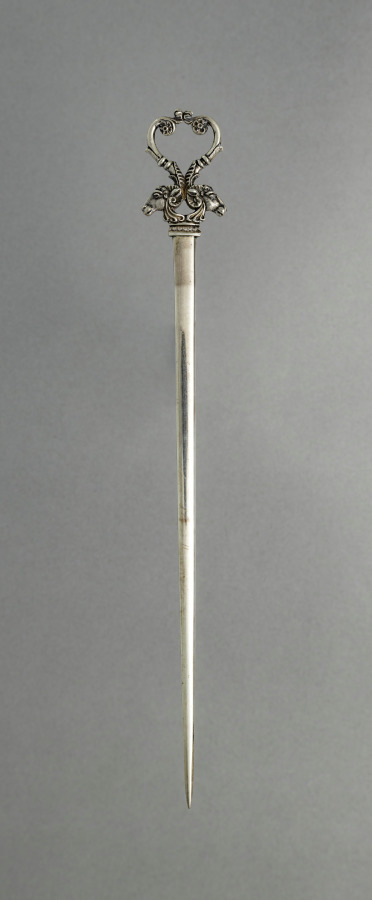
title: Skewer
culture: England, London, late 18th-early 19th Century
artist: firm of William Eley (British)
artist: firm of William Fearn (British)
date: 1800–1801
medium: silver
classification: Silver